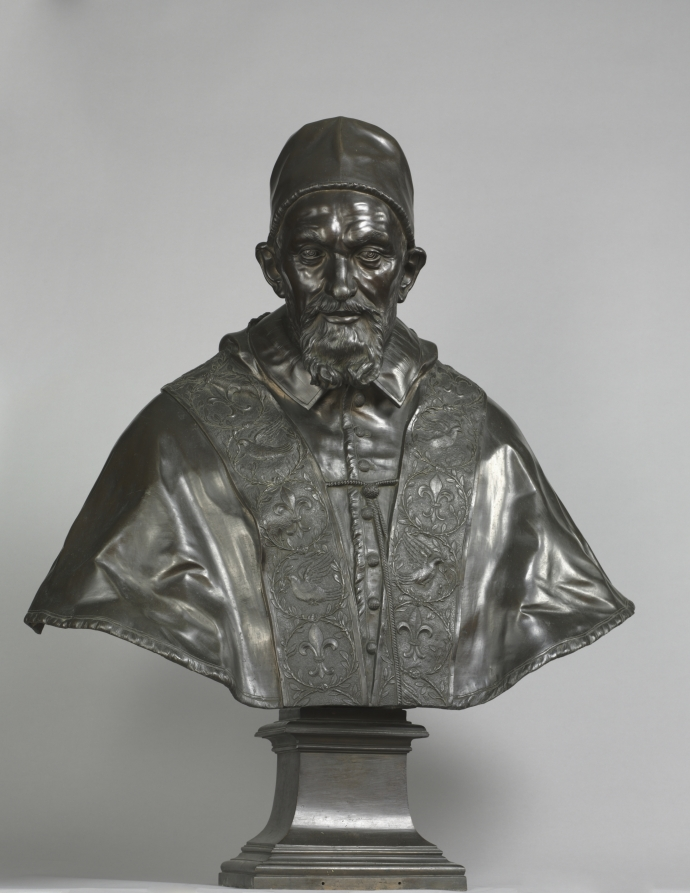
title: Portrait of Pope Innocent X Pamphili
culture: Italy, 17th century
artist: Alessandro Algardi (Italian, 1598–1654)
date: designed 1647–48; cast 1650–1700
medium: bronze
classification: Sculpture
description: Innocent X (Giovanni Battista Pamphili) was pope from 1644 until his death in 1655. Although he was not very interested in the visual arts, he followed tradition and gave several papal commissions for artistic projects. Algardi was the sculptor most frequently called upon by Innocent X. This sensitive portrait captures many details of the pope's costume as well as his intelligent, quiet face.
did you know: The pope's stole features Pamphili family emblems: fleur-de-lis and doves encircled by olive leaves.